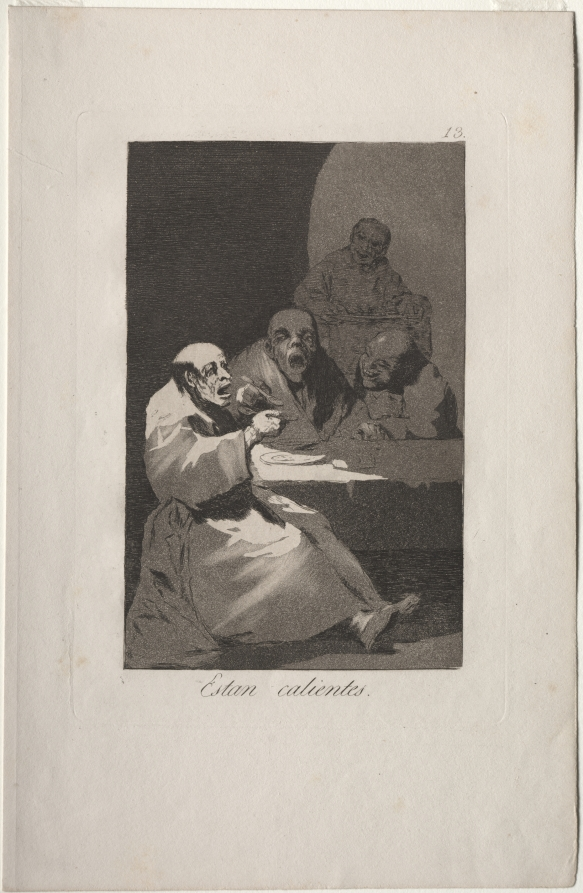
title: They are Hot, Plate 13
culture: Spain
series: Los Caprichos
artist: Francisco de Goya (Spanish, 1746–1828)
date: 1799 (printed c. 1855)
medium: etching and aquatint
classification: Print